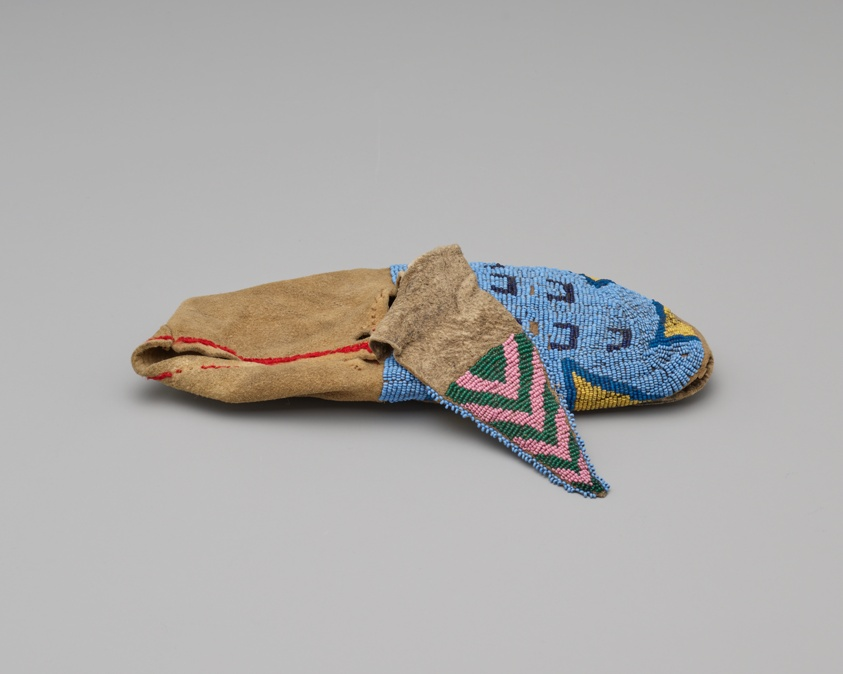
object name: Costume and Accessories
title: Man's Moccasins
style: arapaho, plains indian, native american, americas, Arts of the Americas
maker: Artist unknown (possibly Arapaho, Hinono’ei); Central Plains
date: 1885-90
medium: Leather, red yarn, and glass beads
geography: Central Plains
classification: beadwork; costume; art of the americas